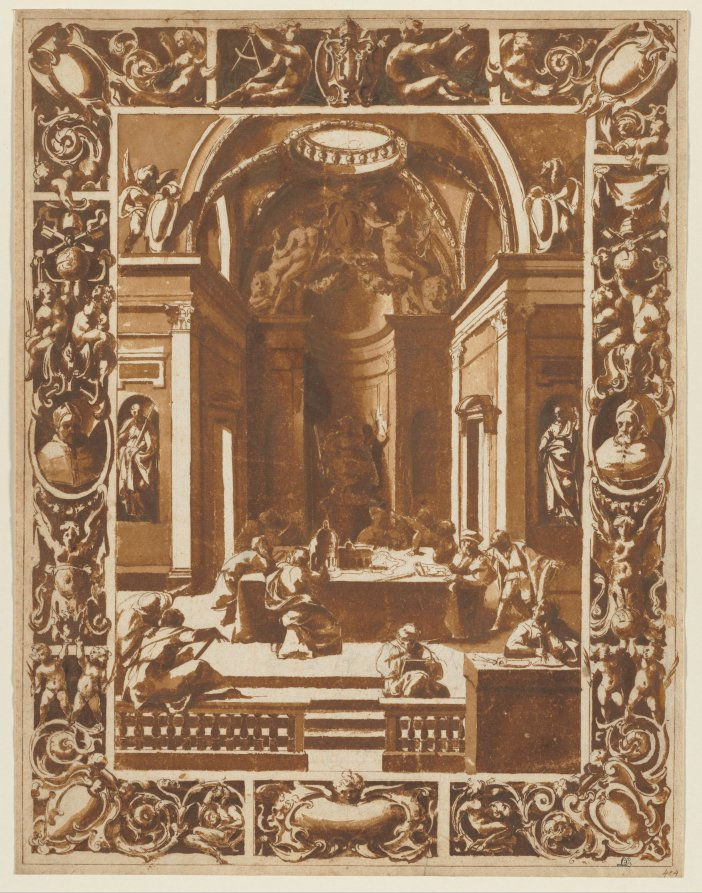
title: Architectural Conference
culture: Italy, 17th century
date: c. 1622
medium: pen and brown ink and brush and brown wash with graphite; framing lines in brown ink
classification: Drawing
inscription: lower right, in brown ink: 404 ; VERSO, center right, in graphite: 2 ; lower center, in graphite: Leonello Spada